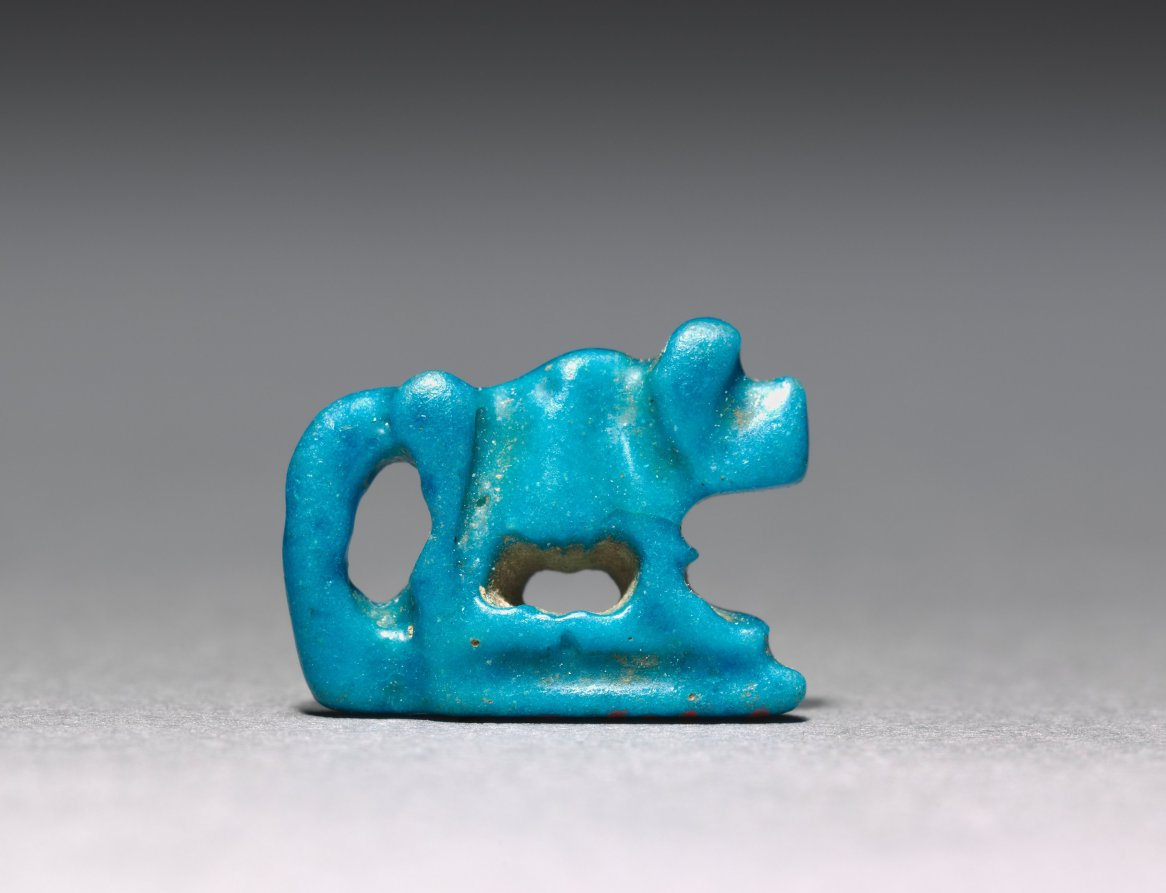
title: Amulet of a Walking Baboon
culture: Egypt, First Intermediate period (2123–2040 BCE)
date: 2123–2040 BCE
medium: turquoise faience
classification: Amulets